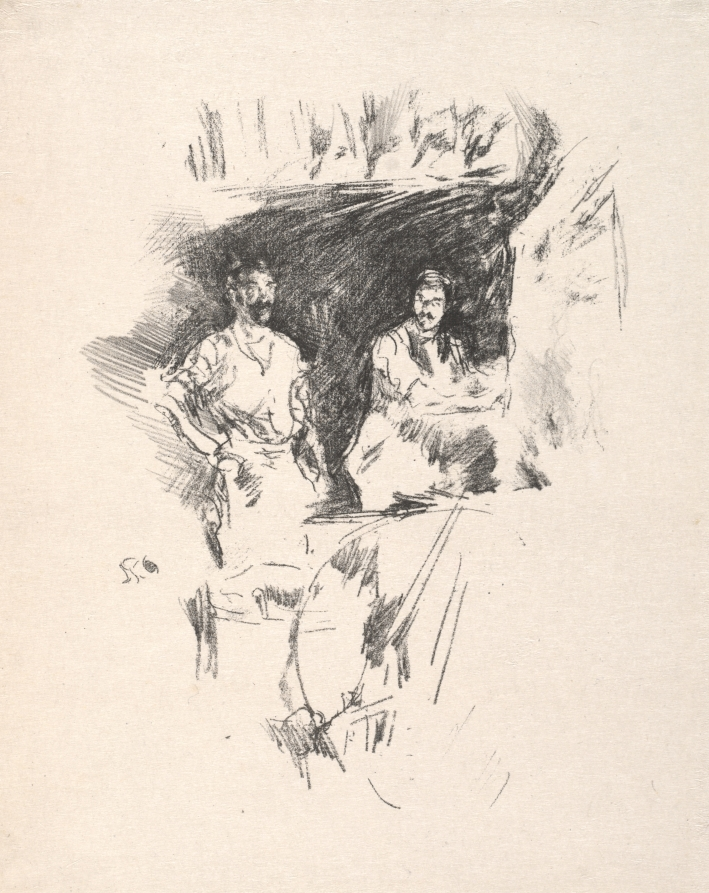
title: The Brothers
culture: America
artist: James McNeill Whistler (American, 1834–1903)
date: 1895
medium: lithograph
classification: Print